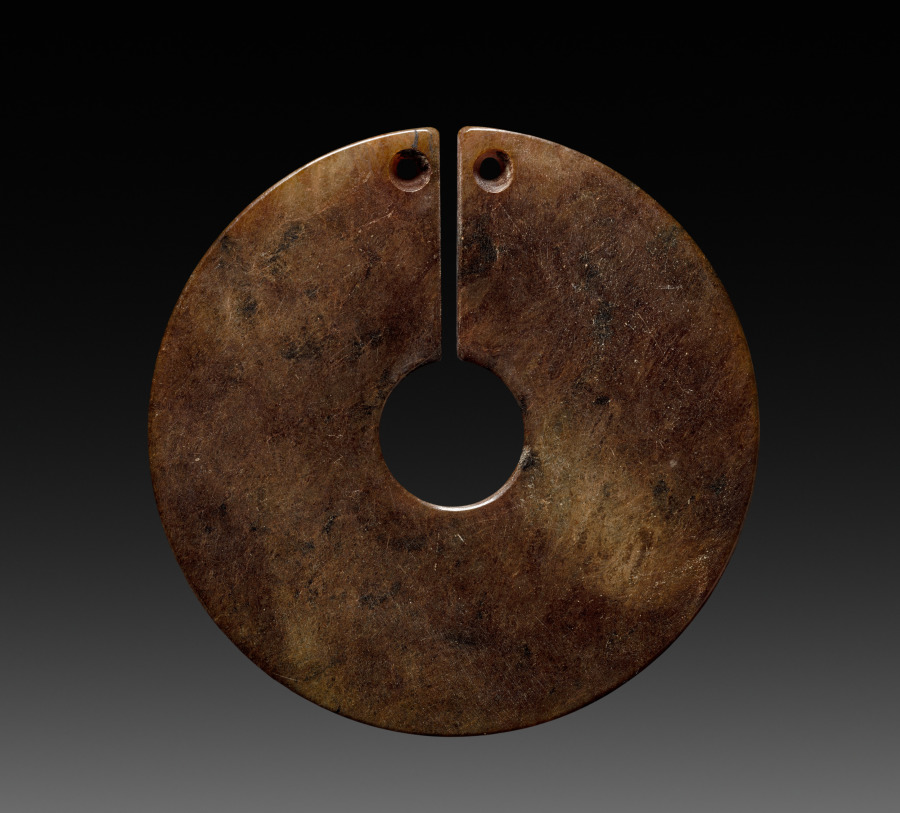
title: Chüeh (Ornament)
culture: China, Han dynasty (202 BCE–220 CE) or earlier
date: 206 BCE–220 CE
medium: jade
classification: Jade